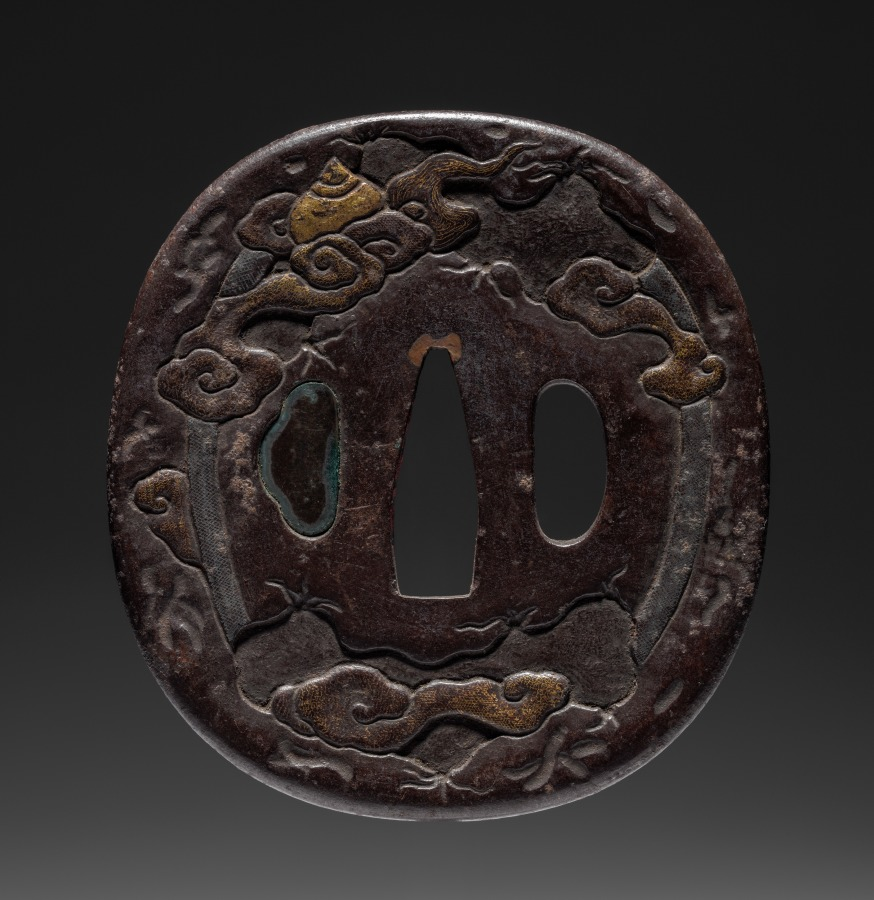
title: Sword Guard (Tsuba) with Dragon and Sacred Jewel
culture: Japan, possibly Edo period (1615-1868)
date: c. 1615–1868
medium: iron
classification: Arms and Armor